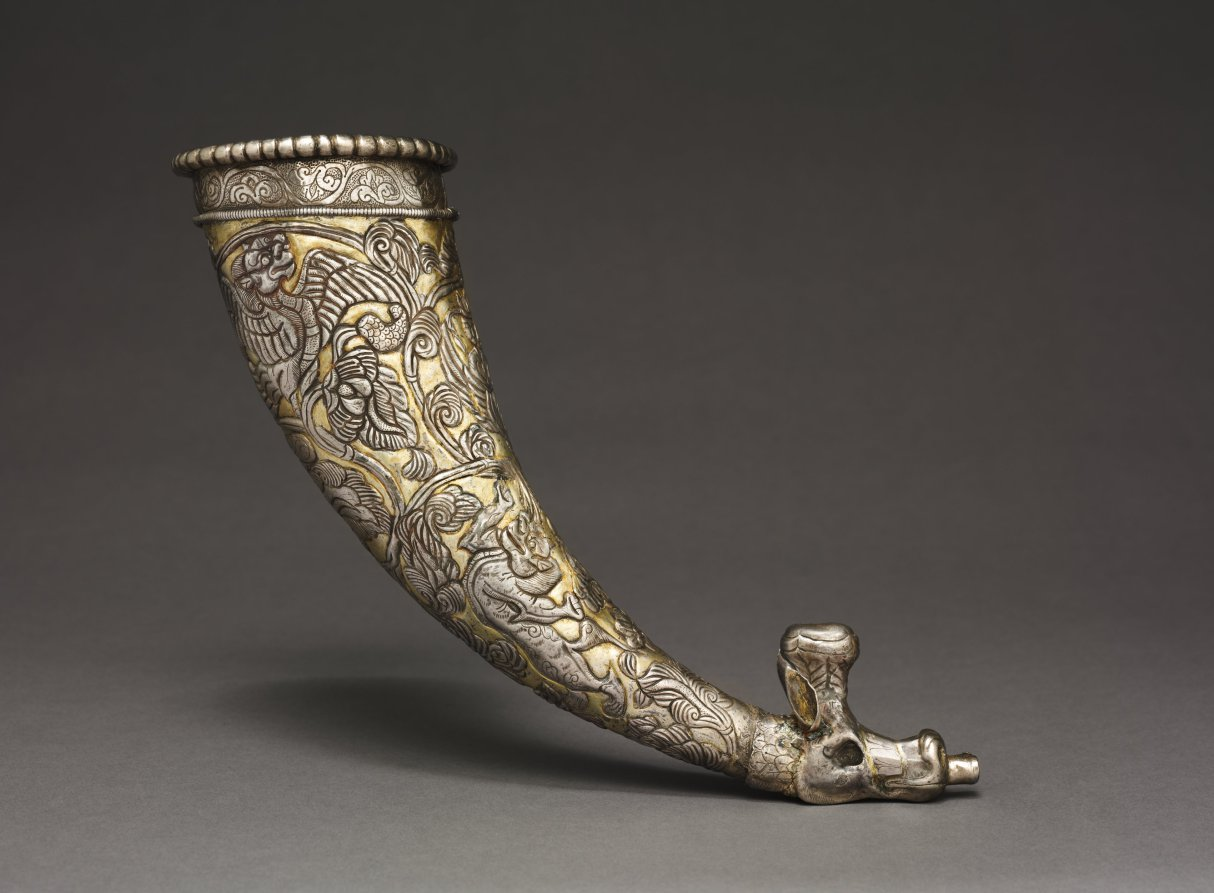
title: Rhyton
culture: Central Asia (Sogdiana) or Tibet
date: c. late 600s–early 700s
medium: silver with gilded foil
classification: Silver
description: The form of the animal-headed rhyton as a drinking vessel and the use of silver are evidence of cultural exchange with Persia, while the lush, luxurious quality of the design and the form of the lions and curling dragon on one side of the decanter reveal an awareness of Chinese forms. Poured into the large opening at the top of the horn, wine then flowed out through the small tube held between the parted lips of a bovine-like animal. To keep from spilling, drinkers could stop the flow of the liquid by holding a thumb over the lower aperture.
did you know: This drinking horn was a communal vessel which guests would pass around to share wine at parties.